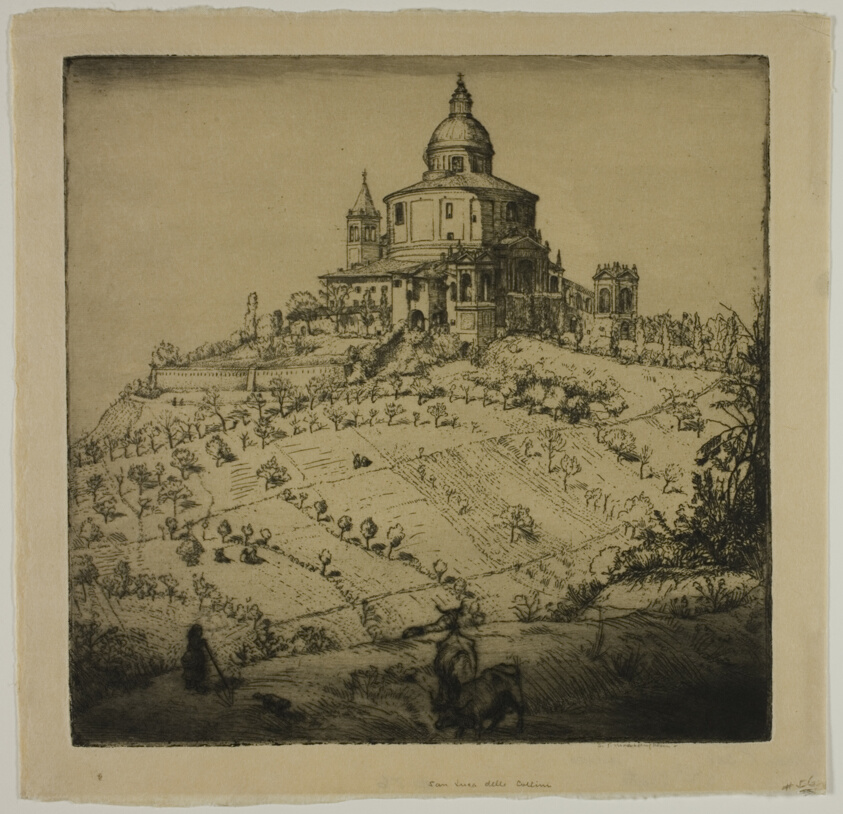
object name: Print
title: San Lucca dei Colli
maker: Donald Shaw MacLaughlan (American, born Canada, 1876-1938)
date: 1904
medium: Etching in black on cream wove paper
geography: United States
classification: etching; print; prints and drawing